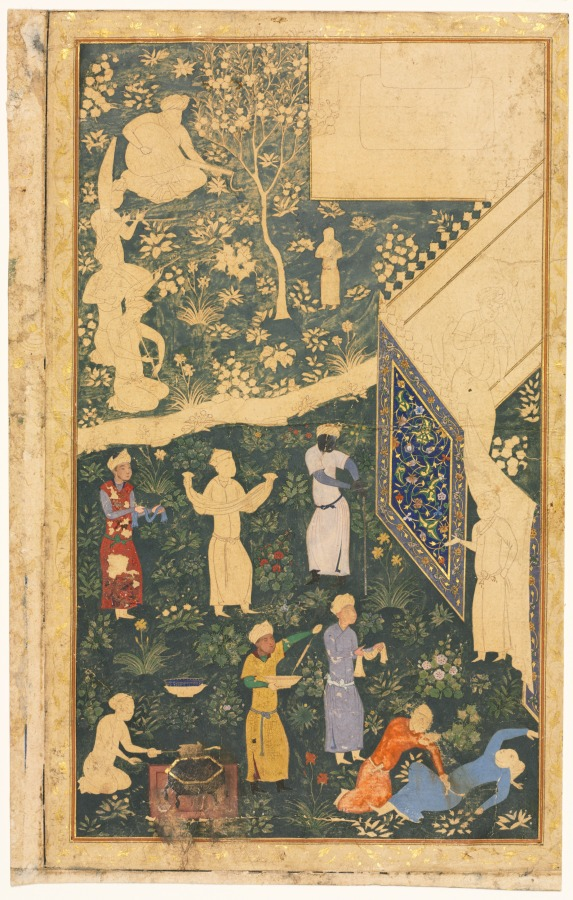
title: Left side of a double-page album folio: Outside a Royal Encampment (recto) and Calligraphy, Persian Verses (verso)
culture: Afghanistan or Iran, Timurid period (1370–1501)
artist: style of Bihzad (Iranian, active 1470–1506)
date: c. 1485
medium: opaque watercolor, ink, and gold on paper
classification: Manuscript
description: The painting is the left side of a double composition; at the upper left are musicians who provide ambient entertainment. A cook prepares meat over a brazier, while a servant brings kebab on a shallow bowl. The unfinished state of this painting reveals the artist's process of creating underdrawings that are filled with color. The verso has an example of calligraphy.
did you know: Intoxicated, a man in blue at the lower right has fallen.